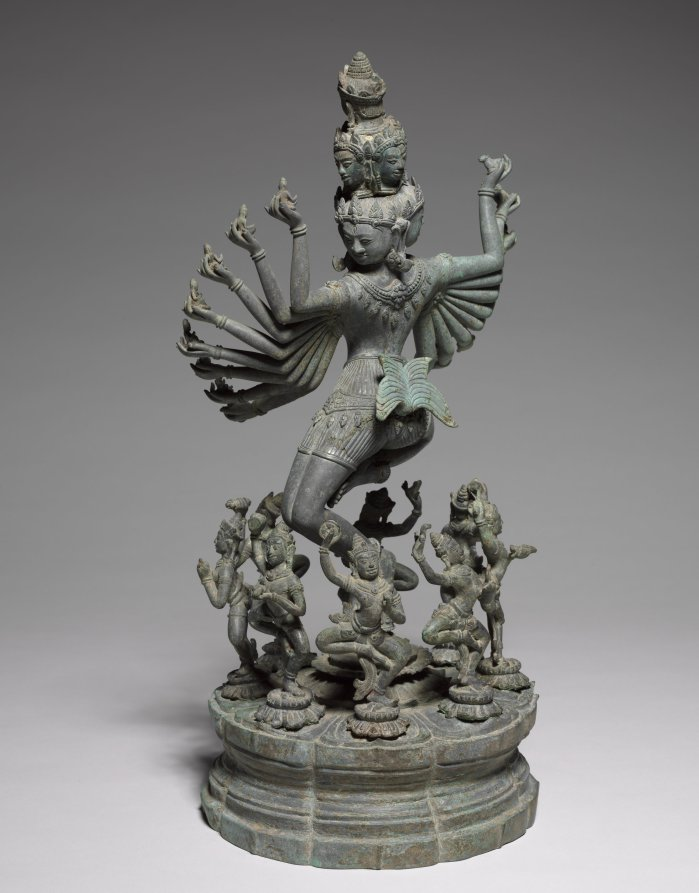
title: Hevajra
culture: Northeastern Thailand, former kingdom of Angkor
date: c. 1200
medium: Bronze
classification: Sculpture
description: Hevajra was an important figure signaling the practice of Buddhist rituals. King Jayavarman VII placed particular emphasis on Hevajra during consecration rituals and set up a colossal stone sculpture of dancing Hevajra at the east gate of his fortified city in the Khmer capital at Angkor. In the Cambodia of Jayavarman VII, tantric Buddhism became public and widespread, practiced together with other more mainstream forms of Buddhism, Hinduism, and ancestor worship. The iconography of Hevajra is described in detail in a text that bears his name, the Hevajra-tantra, first composed in India probably in the 800s. Hevajra has eight heads, sixteen arms, and four legs. His left hands hold images of Indic gods; wealth, death, sun, moon, fire, wind, water, and earth. In his right hands are animals: bull, lion, human, cat, camel, sheep, horse, and elephant. They all sit in skull cups, objects also used in tantric rituals. He dances on a corpse that embodies ignorance and is surrounded by eight yoginis who dance triumphantly in a ring around him. Yoginis functioned as intercessors between human practitioners and enlightened beings. Many bronze images of Hevajra were made during the reign of Jayavarman VII, but few survive in as pristine condition as this example. According to scientific analysis and curatorial reports, this sculpture survived in a clay vessel submerged in water, which accounts for its high tin content and unusual gray patina. Samples from the clay core reveal the presence of the mineral feldspar, a characteristic of clay from the Isaan plateau, on the other side of the mountain range not far from Banteay Chhmar, in present-day Thailand.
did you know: Hevajra, the Tantric Buddhist deity who personifies Enlightenment, dances vigorously to symbolize the human soul's liberation from the snare of existence.